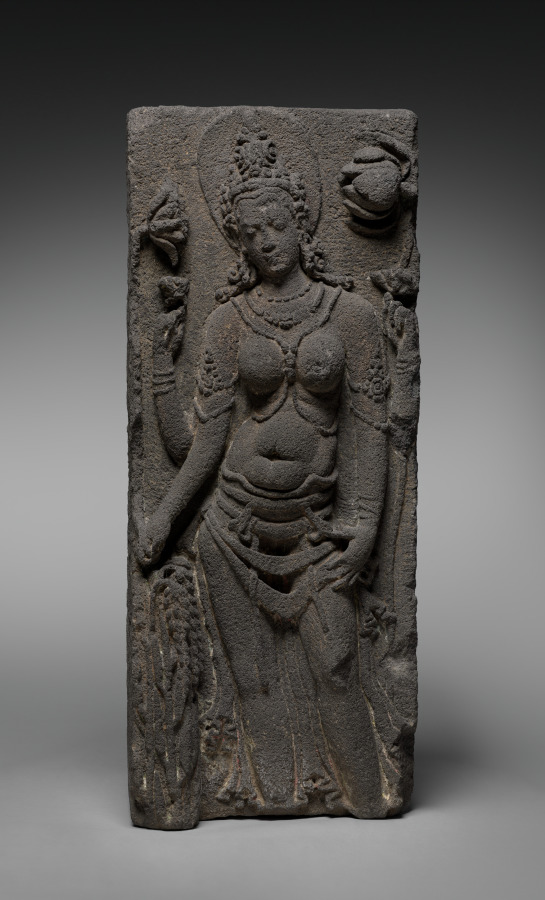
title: Goddess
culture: Indonesia, Central Java, Boyolali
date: 800s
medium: volcanic stone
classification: Sculpture